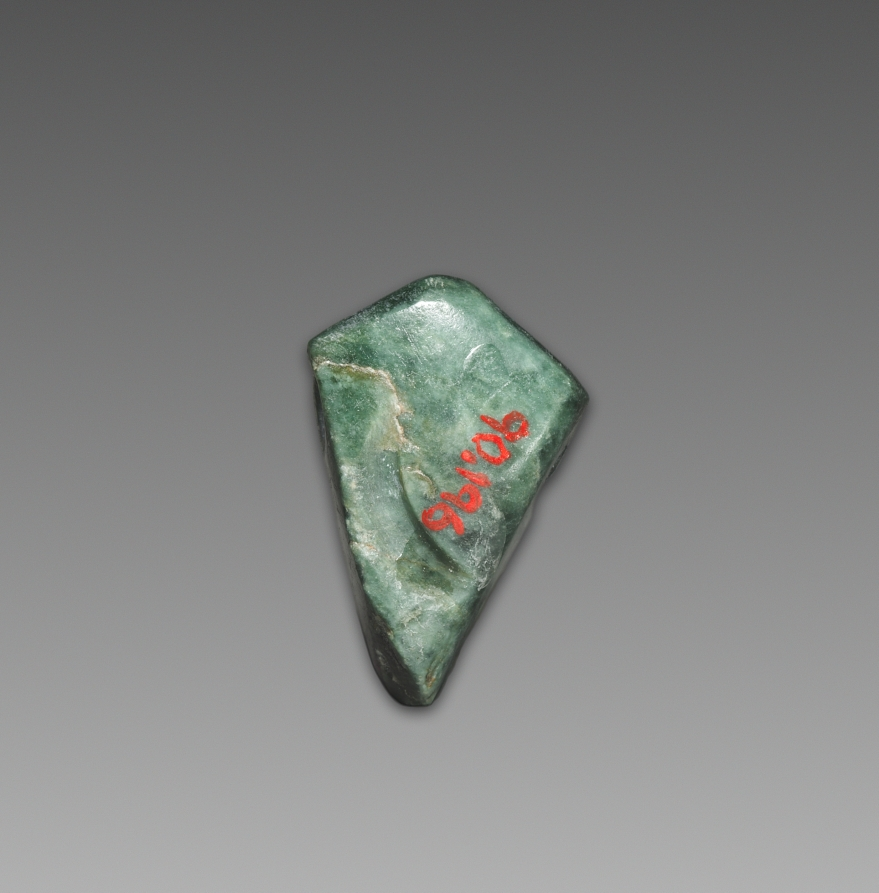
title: Head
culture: Mesoamerica, Pre-Columbian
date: before 1519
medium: serpentine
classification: Sculpture